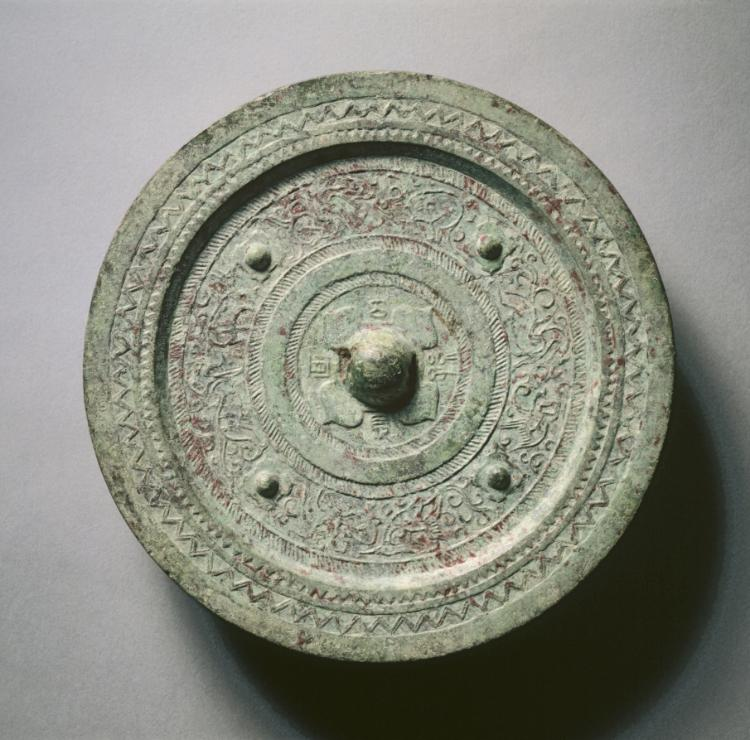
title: Mirror with Quatrefoil, Four Nipples, Animals, and Birds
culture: China, Western Han dynasty (206 BCE–8 CE)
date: late 300s BCE–50 CE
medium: bronze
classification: Metalwork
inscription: May [this mirror] be cherished by your sons and grandsons.